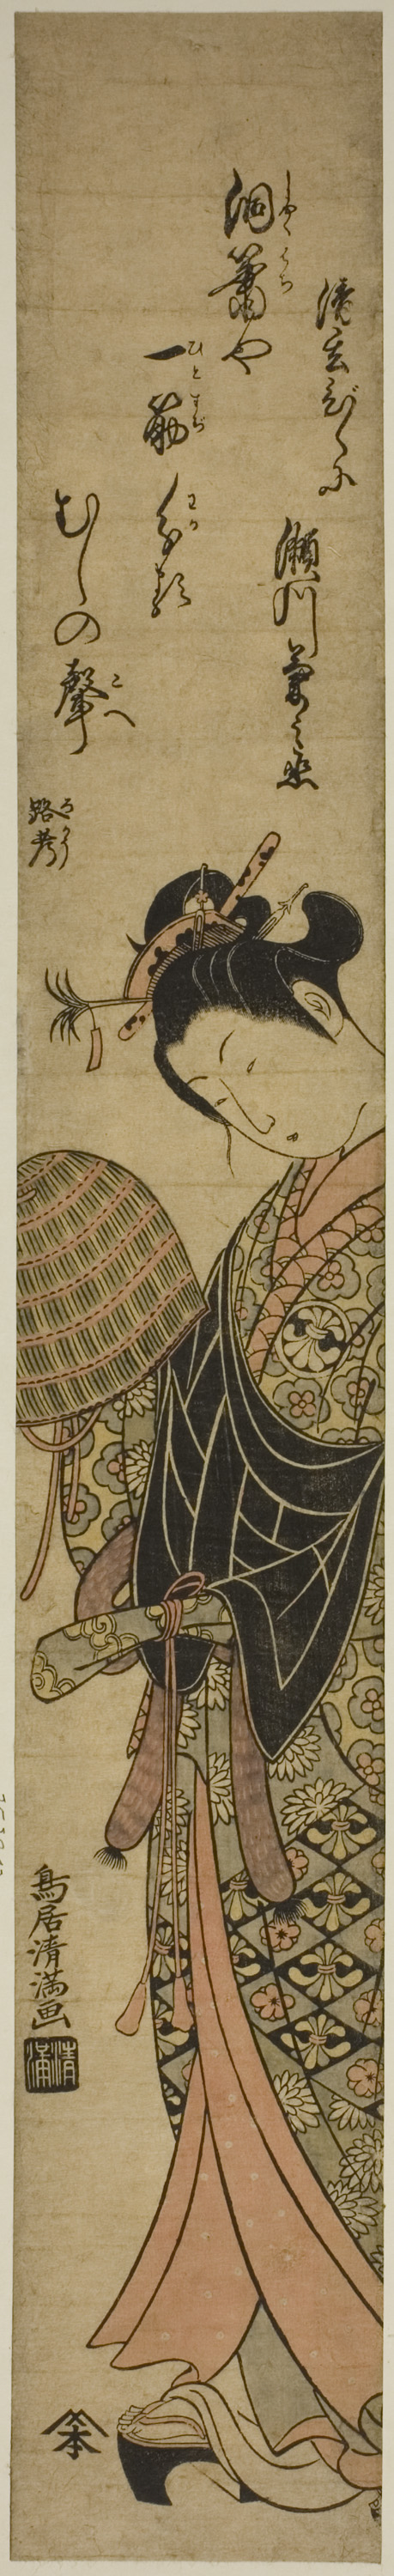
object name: Print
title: The Actor Segawa Kikunojo II as the nun Seigen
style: Japanese (culture or style)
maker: Torii Kiyomitsu I (Japanese, 1735–1785)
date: c. 1762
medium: Color woodblock print; hashira-e, benizuri-e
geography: Japan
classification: woodblock print; print; asian art